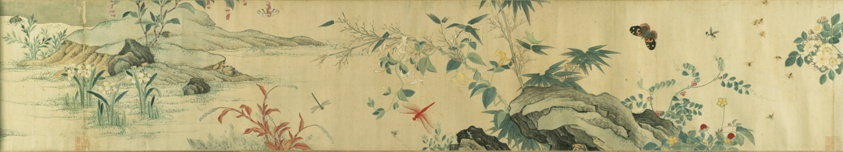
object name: Painting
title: Flowers and Insects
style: Chinese (culture or style)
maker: Chai Zhenyi 柴貞儀 and Chai Jingyi 柴靜儀; Chinese, 17th century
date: Qing dynasty (1644–1911), reign of Kangxi (1662–1722)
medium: Handscroll; ink and color on paper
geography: China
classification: handscroll; painting; asian art